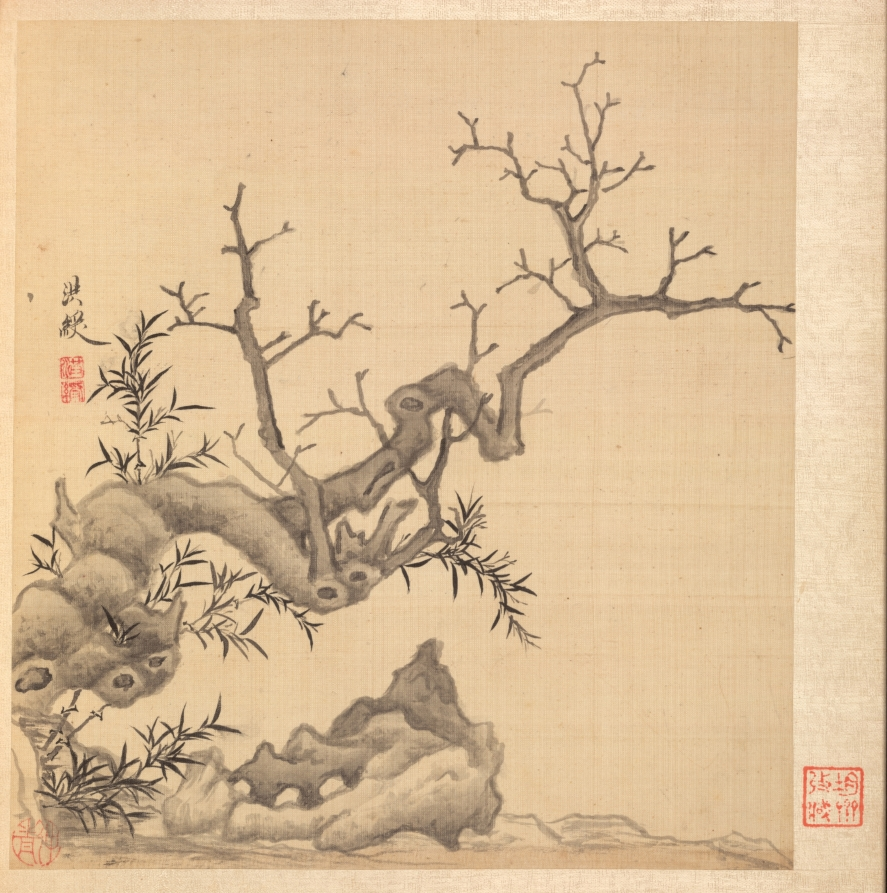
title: Paintings after Ancient Masters: Rock, Old Tree, and Bamboo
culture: China, Ming dynasty (1368–1644)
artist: Chen Hongshou (Chinese, 1598/99–1652)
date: 1598–1652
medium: album leaf, ink and color on silk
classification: Painting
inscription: Hongshou [seal] Hongshou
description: The twenty paintings in this double-album by Chen Hongshou include landscapes, figures, and flowers. It also has one leaf featuring a woman, an often-used subject not found in the other albums from the latter part of his career. His late works are wonderful summations of Chen's peculiar and quirky art--archaistic, hyper-refined--but without accompanying shallowness or sentimentality. His figures and landscapes in the late albums are miniaturized, not unlike the small Chinese gardens, or the carefully selected small table rocks or old roots used for contemplation to see the world in miniature. This loss of scale is quite deliberate and reflects the psychological situation of a depressed class like the Ming loyalist officials and scholars, deprived of their integrity and honor, and forced to lead a diminished and restricted existence.